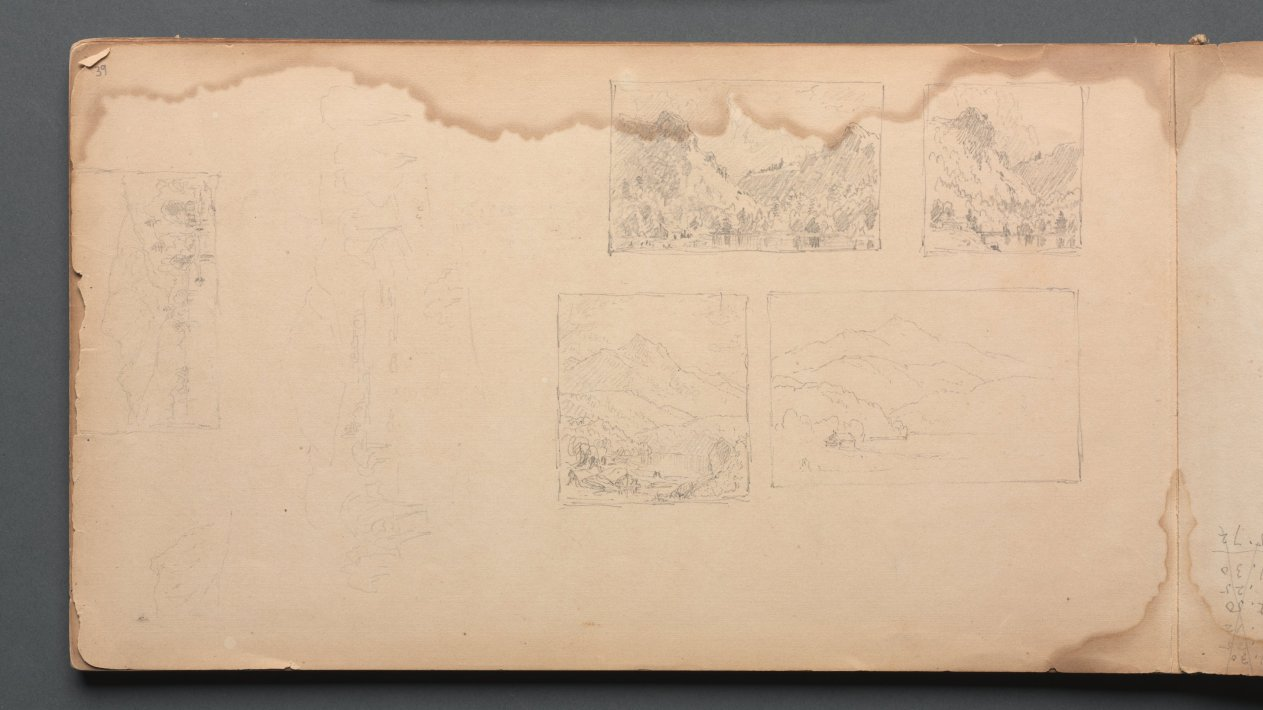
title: Sketchbook, page 39: Maine Landscape Vignittes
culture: America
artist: Sanford Robinson Gifford (American, 1823–1880)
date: 1859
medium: graphite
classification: Bound Volume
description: Gifford was an American landscape painter belonging to the second generation of Hudson River school artists. Based in New York City with a studio at the Tenth Street Studio Building, Gifford took annual summer trips to the Catskills, the Adirondacks, and other scenic locations in New England. This sketchbook accompanied the artist on his expedition in 1859 to New Hampshire and Maine, where he drew sites such as Dixville Notch, the White Mountains, and Peaks Island, Casco Bay. Gifford used such graphite studies as the basis for oil paintings worked up in his studio, such as A Home in the Wilderness (1866).